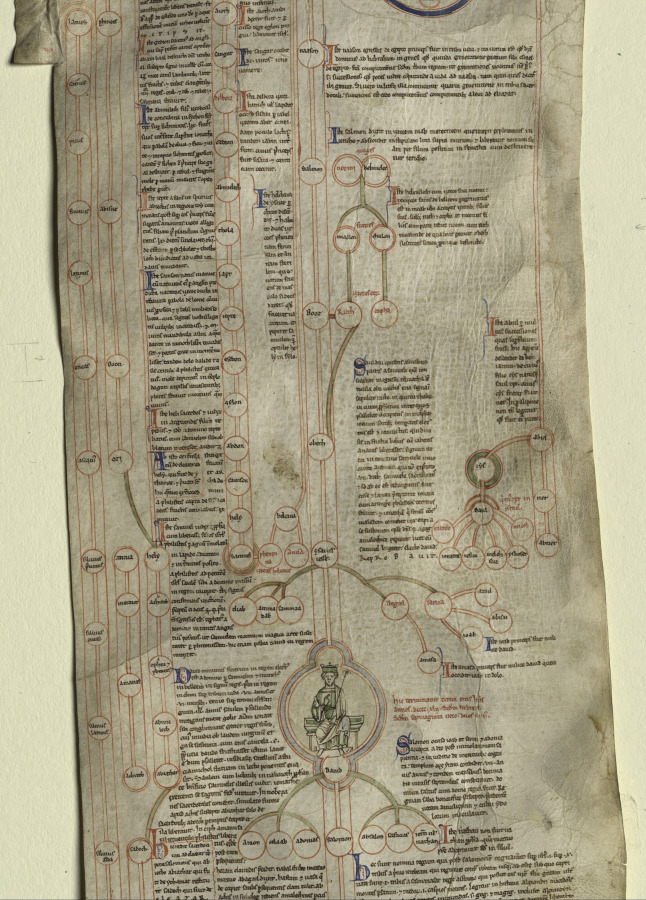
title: Peter of Poitiers's "Compendium Historiae in Genealogia Christi"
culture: England, Canterbury, 13th century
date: c. 1220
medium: ink and tempera on a vellum roll of four membranes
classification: Manuscript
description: This manuscript roll, composed of four membranes formerly stitched together in a continuous roll about nine feet long, has been divided in the middle for easier visibility and study. The text is an abridgment of biblical history focused on the descent of Christ from Adam. It was written by Peter of Poitiers (about 1130–1205), who taught theology and history in Paris and was widely copied. The present roll is an English copy of Peter's text made shortly after his death. Although manuscript rolls were hung on the walls of a classroom as instructional aids to students, some of them have value beyond their textual and historical interest because of the fine quality of their drawings, as seen here. A comparison with Canterbury manuscripts and stained glass of around 1220 is the basis for the attribution to Canterbury. Peter of Poitiers's aim in this project was to assist students prevented from mastering biblical history because of its length and because they were too poor to own books. His text on roll is the briefest possible summary of biblical history. It is arranged in six historical stages, denoting the six ages of the world, as decreed by theological tradition. The first five ages were inaugurated by Old Testament individuals: Adam, Noah, Abraham, David, and Sedecias. The birth of Christ heralded the sixth stage. Beginning at the top of the first membrane, the text consists of brief biographical entries on the ancestors of Christ (Adam, Noah, Abraham, Moses, and David) and other biblical personalities. These extend to the birth of Christ on the fourth membrane, ending with accounts of Hebrew and Roman kings and the Apostles. Each compendium shows the names of the ancestors inscribed within circles, those of direct descent placed vertically in a central column, others scattered in clusters to the right and left. The decoration of the roll consists of a series of medallions of diverse geometrical frames filled with either a figural drawing or a diagram. The style of these pen-and-ink drawings, some illuminated in tempera or tinted with wash, stems from English manuscript and glass painting attributed to the school of Canterbury Cathedral. The style of the museum's illustrations is so close to the stained glass panels made for Trinity Chapel at Canterbury (about 1220) to suggest that an artist active as a glazier in the Cathedral workshop may also have executed the manuscript. In the least, the painter of the roll manuscript was familiar with the style of the painted glass, and on this basis, a date of about 1220 seems appropriate. Additional evidence is supplied by a psalter illuminated at Canterbury shortly before 1220. The figurative scenes in this psalter were apparently illustrated by the same hand that executed the line and wash drawings in the museum's roll.